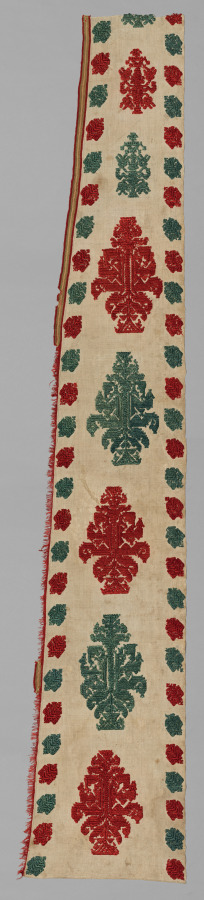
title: Portion of a Bed Tent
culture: Greece, Dodecanese Islands, Rhodes, 18th century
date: 1700s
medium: embroidery: silk on linen tabby ground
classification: Embroidery